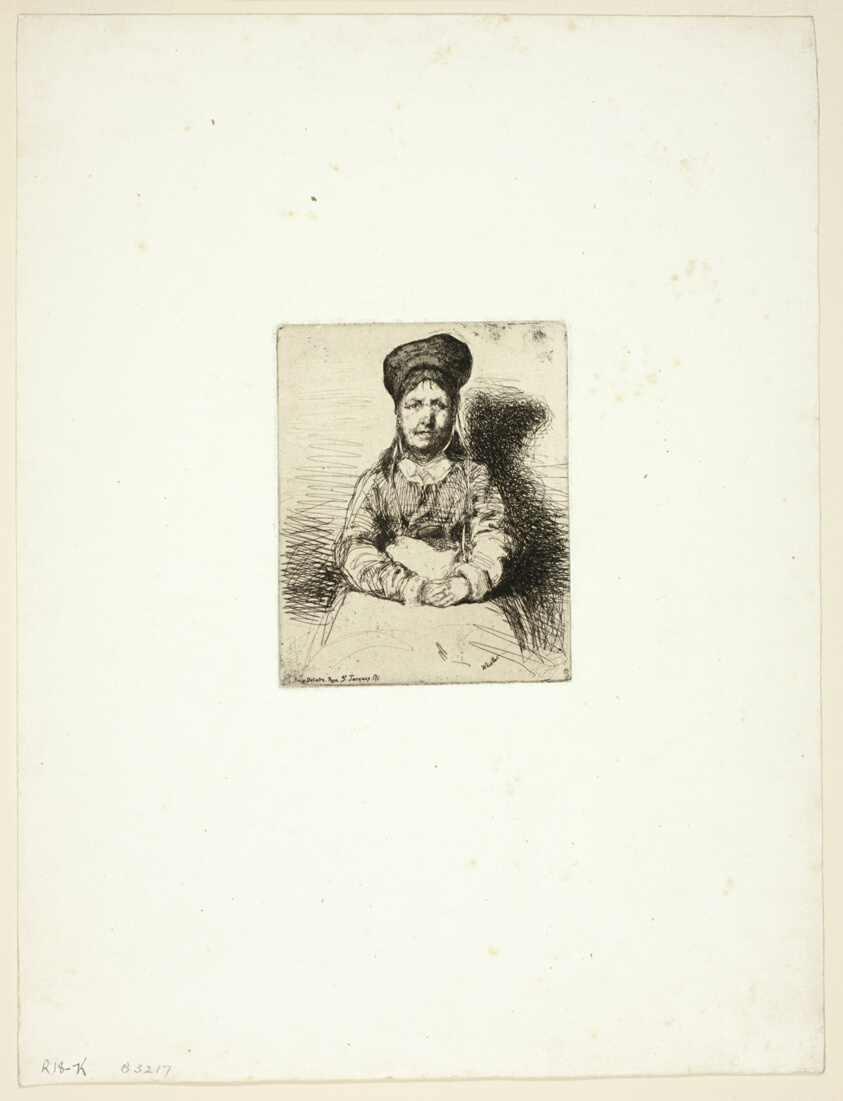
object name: Print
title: La Rétameuse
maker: James McNeill Whistler (American, 1834-1903)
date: 1858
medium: Etching with foul biting in black ink on cream China paper, laid down on ivory wove paper (chine collé)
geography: United States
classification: etching; print; prints and drawing; foul biting; paper